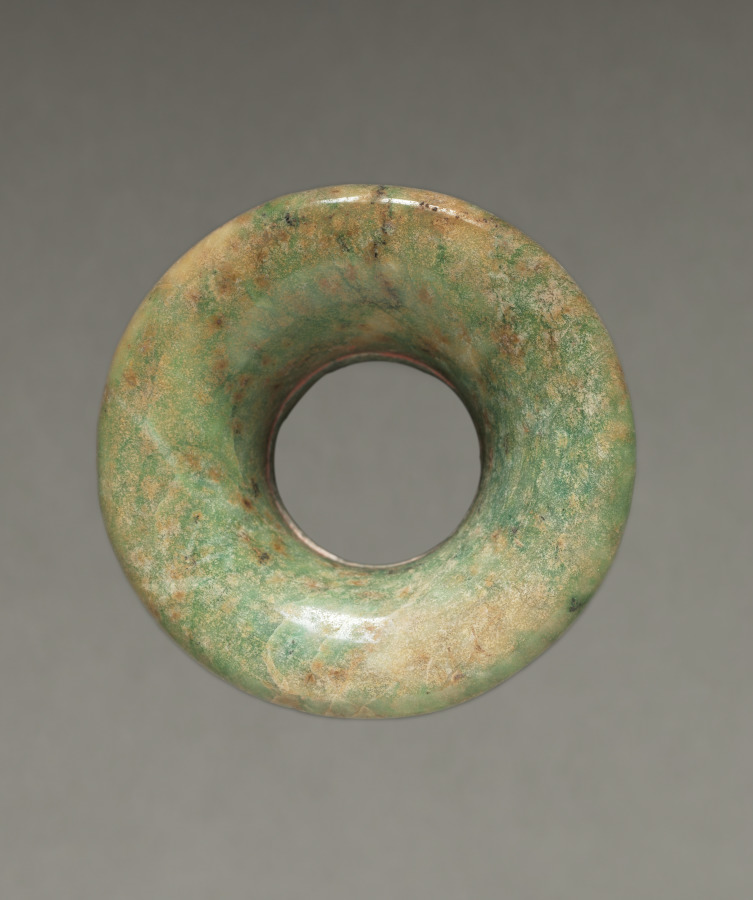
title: Ear Ornament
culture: Central Mexico, Teotihuacán style, Classic period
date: 150–200 CE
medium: jadeite-albitite(?)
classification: Sculpture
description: Near Teotihuacán's largest palace is a small temple gorgeously ornamented with green-feathered serpents, symbols of the earth's fertility. Beneath the temple lie at least 120 human sacrifices, most men, many warriors, and some wearing greenstone ornaments like these, perhaps a set. The sacrifices, apparently laid out to mark the cardinal directions, may have consecrated the temple or a ruler's tomb, or both.